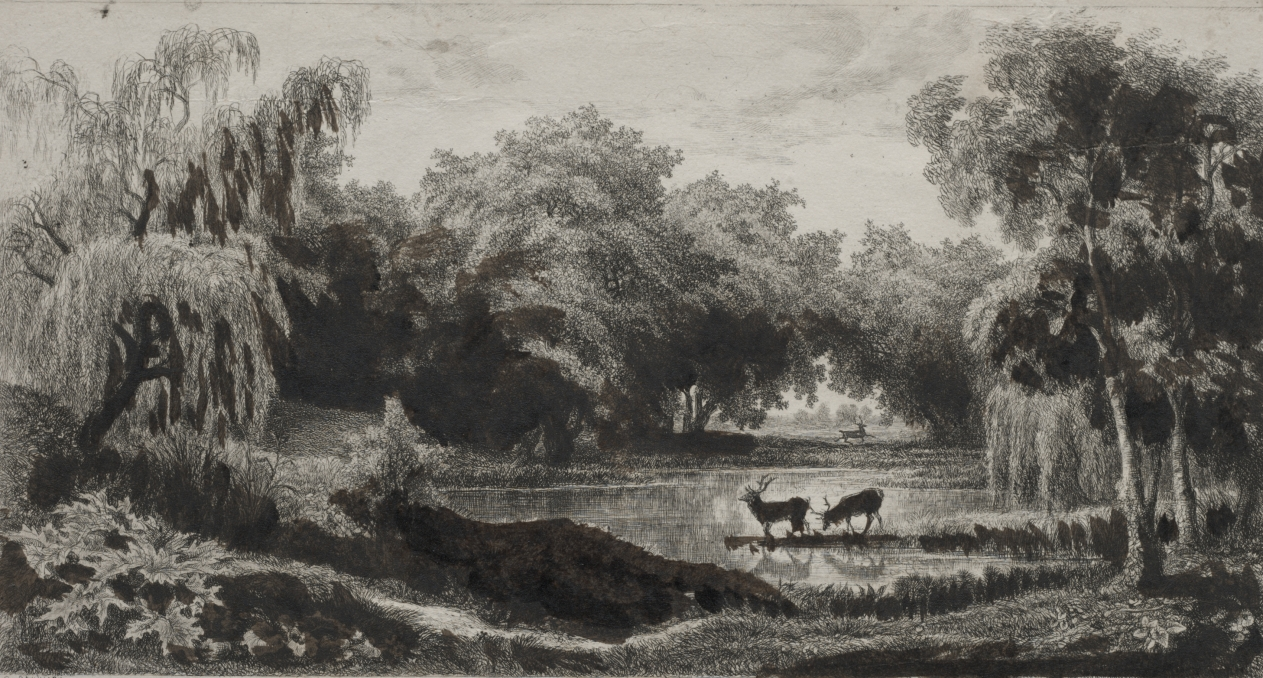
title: The Pool with Stags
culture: France, 19th century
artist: Charles François Daubigny (French, 1817–1878)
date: 1845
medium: etching, hand colored with watercolor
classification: Print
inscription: signed, lower left, in plate: C. Daubigny; signed, lower right, in plate: C. Daubigny